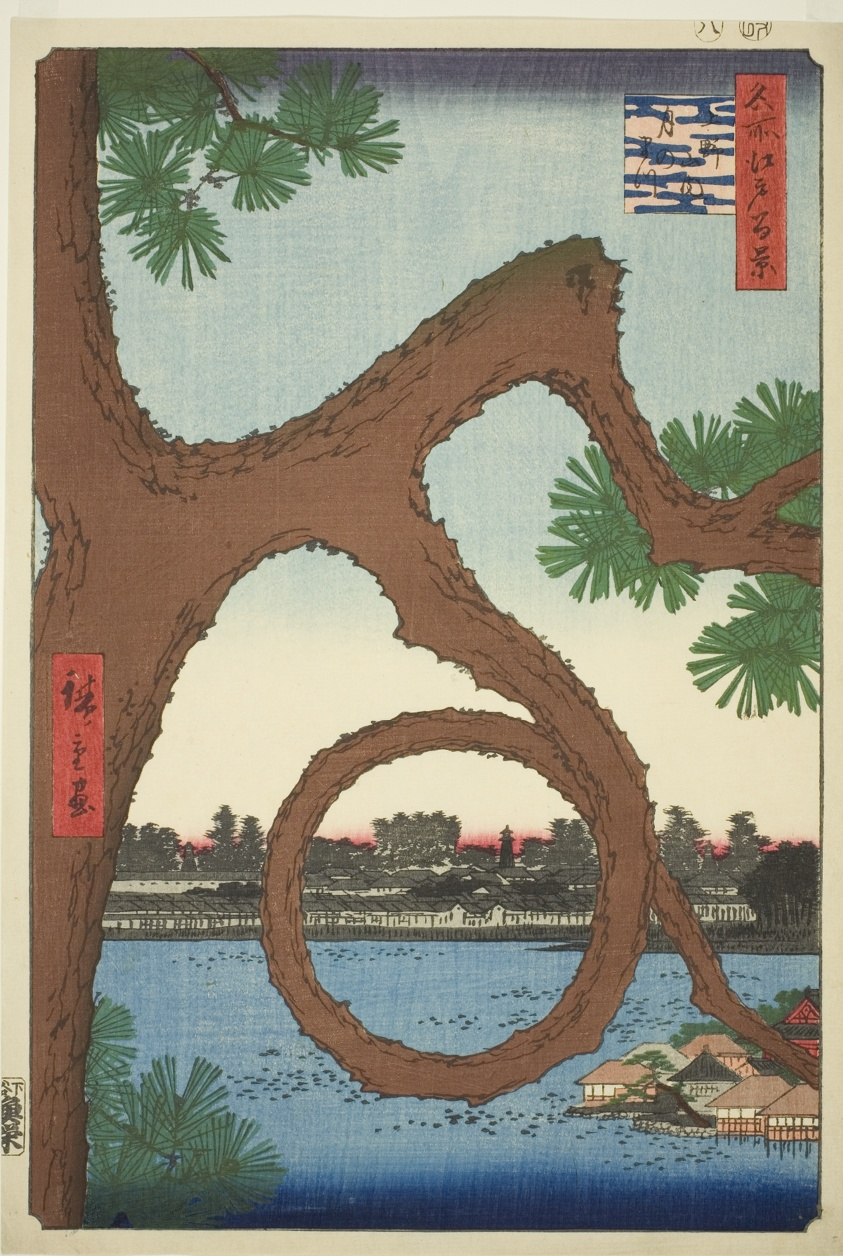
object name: Print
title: The Moon Pine on the Temple Grounds at Ueno (Ueno sannai Tsuki no matsu), from the series "One Hundred Famous Views of Edo (Meisho Edo hyakkei)"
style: Japanese (culture or style)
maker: Utagawa Hiroshige 歌川 広重; Japanese, 1797-1858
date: 1857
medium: Color woodblock print; oban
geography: Japan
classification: woodblock print; print; asian art